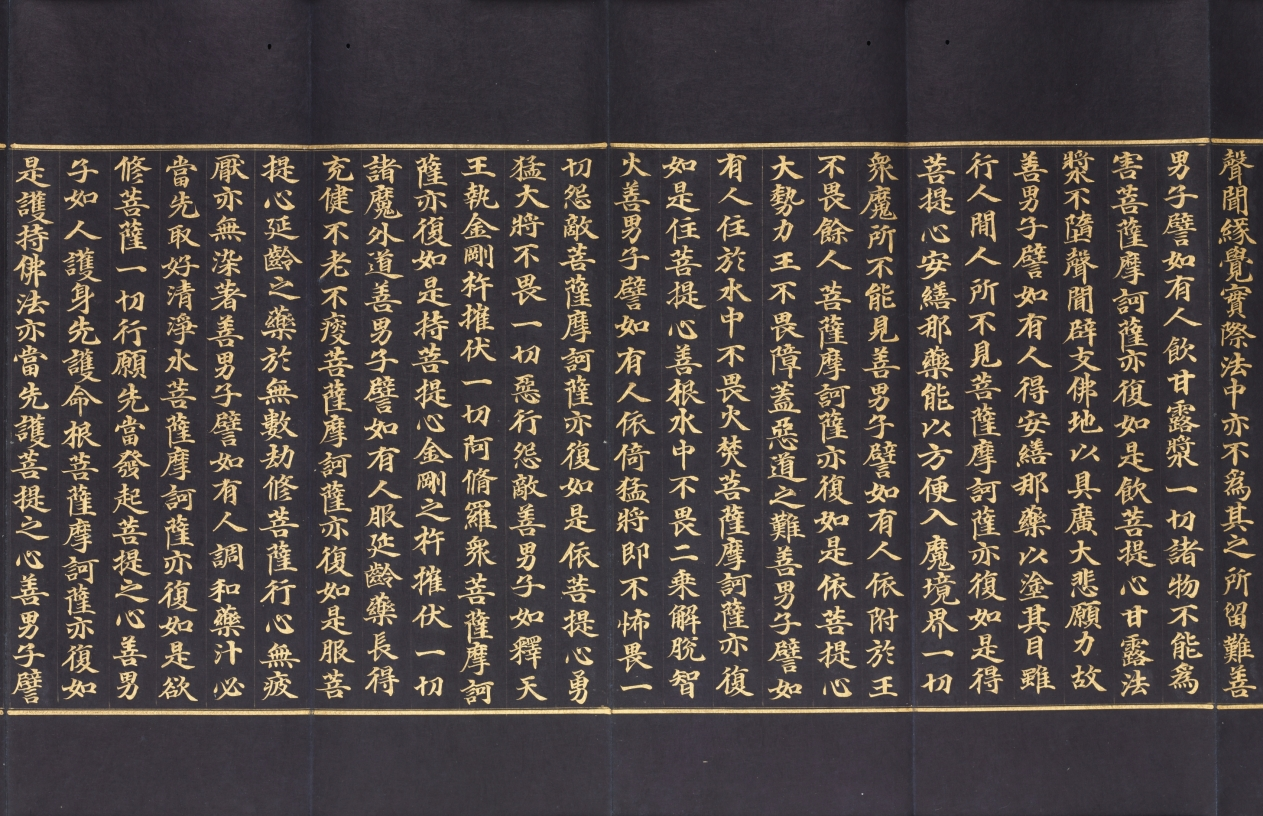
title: Avatamsaka Sutra No. 78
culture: Korea, Goryeo dynasty (918–1392)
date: 1300s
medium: Folded book with illustrated frontispiece; gold and silver on mulberry paper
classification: Bound Volume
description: This illuminated manuscript presents one part of the multivolume sacred text titled Avatamsaka (Flower Garland) sutra. Both the script and the image are rendered in gold ink on the smooth surface of the dark blue, indigo-dyed mulberry paper. This portion of the text, which reads from right to left, describes the encounter of the Buddha of the Future (Maitreya) and the young pilgrim Sudhana. The Buddha gives his words of wisdom to Sudhana, who asks questions about the path toward spiritual awakening. Mixed with ink and glue, the gold has a brilliance that strikingly reflects Sudhana’s ardent quest for understanding the way to reach enlightenment.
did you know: The pristine condition of this manuscript indicates that it was rarely used after its creation, revealing that the act of making a manuscript rather than reading it was the main religious goal.